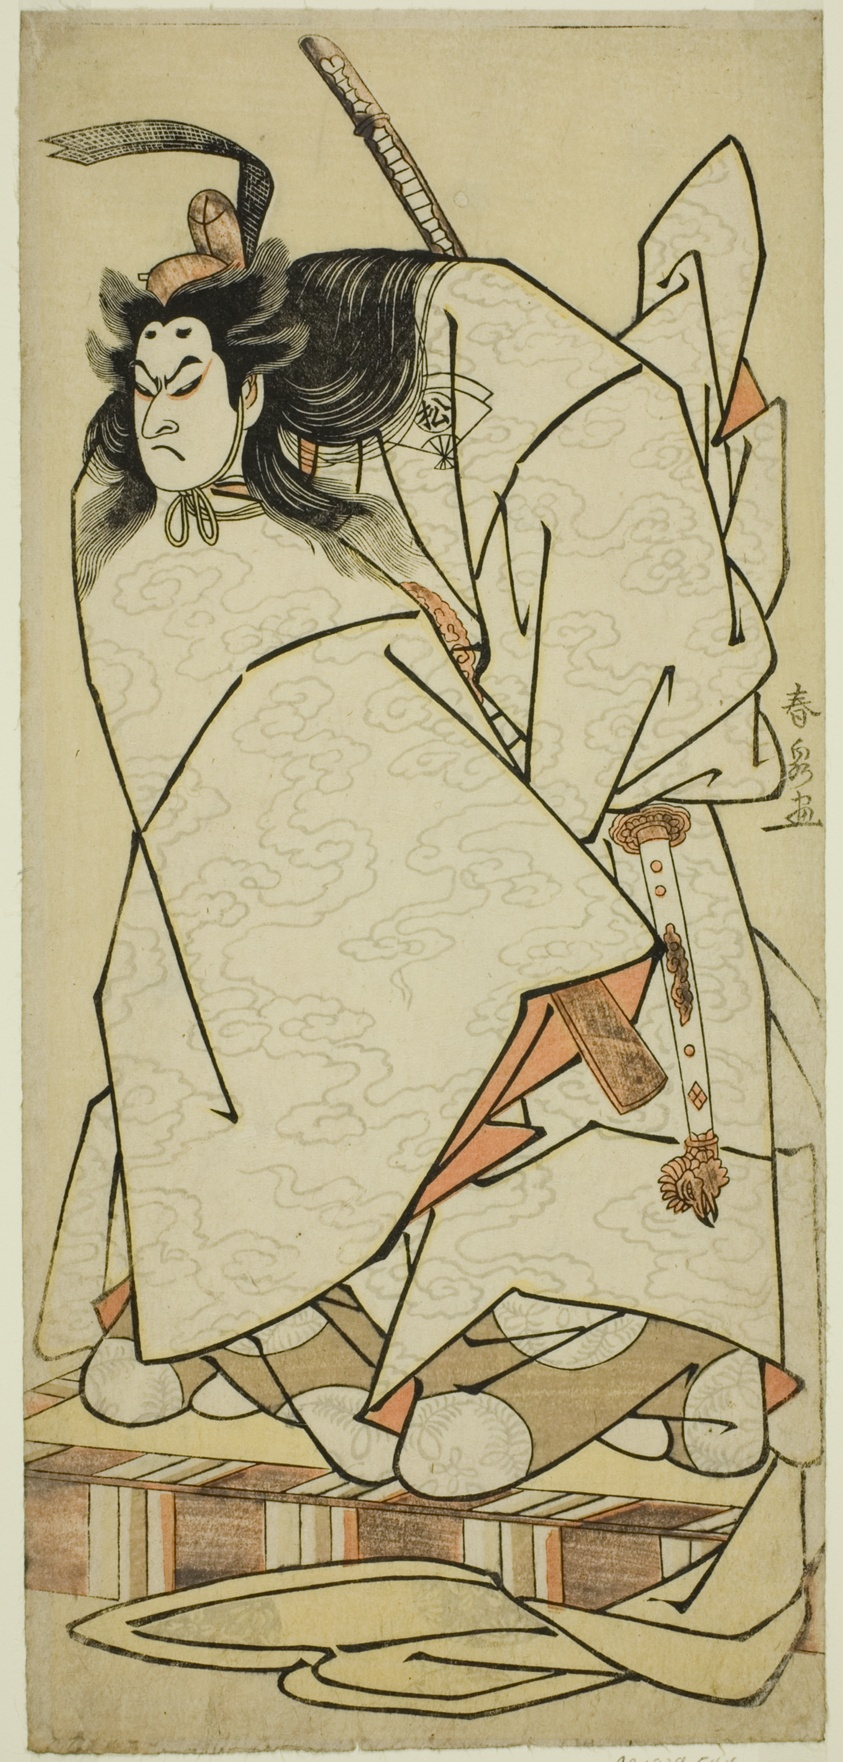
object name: Print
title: The Actor Onoe Matsusuke I as Ashikaga Takauji in the Play Kumoi no Hana Yoshino no Wakamusha, Performed at the Nakamura Theater in the Eleventh Month, 1786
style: Japanese (culture or style)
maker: Katsukawa Shunsen (Japanese, active 1780s-early 1790s)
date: c. 1786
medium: Color woodblock print; hosoban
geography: Japan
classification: woodblock print; print; asian art